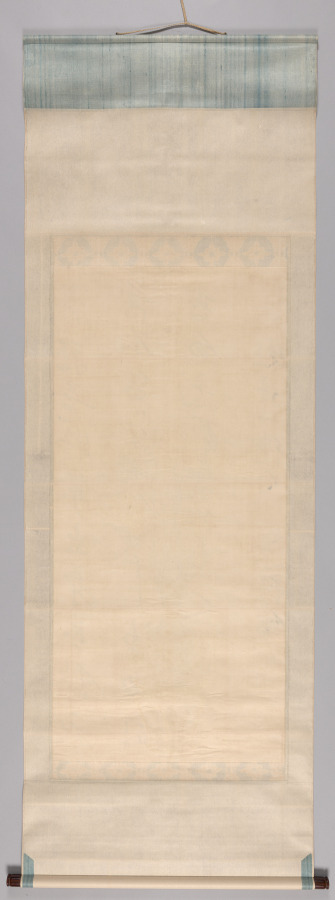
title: A Quatrain about Peonies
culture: China, Qing dynasty (1644–1911), Qianlong reign (1736–95)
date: 1736–95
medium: Hanging scroll; polychrome woodblock print; ink and color on paper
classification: Print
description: Woodblock printing in color reached its height in China in the 1600s to 1700s. It was executed by means of sets of separate blocks, each carved to print a different color.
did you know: In the 1600s, printing flourished in such Jiangnan cities as Nanjing, Suzhou, Hangzhou, and Huizhou, evolving from privately enjoyed illustrated books printed in color to more commercialized single-sheet color prints that were hung on walls and became part of the rich urban visual culture.